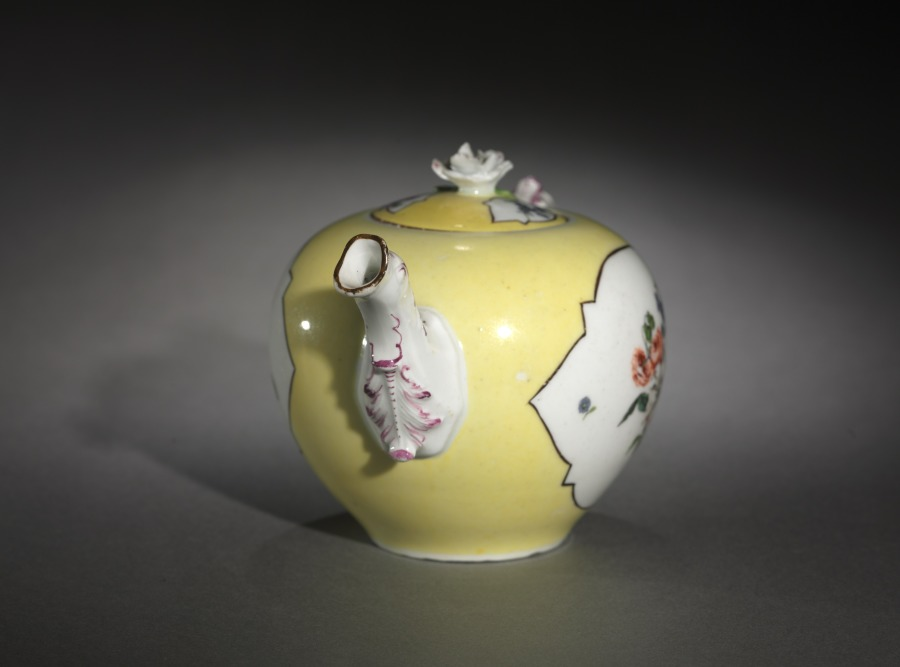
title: Teapot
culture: Germany, Meissen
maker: Meissen Porcelain Factory (German, est. c. 1710)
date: c. 1750–70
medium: porcelain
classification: Ceramic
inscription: Mark on the bottom that looks like two swords crossing, with a small V intersecting.